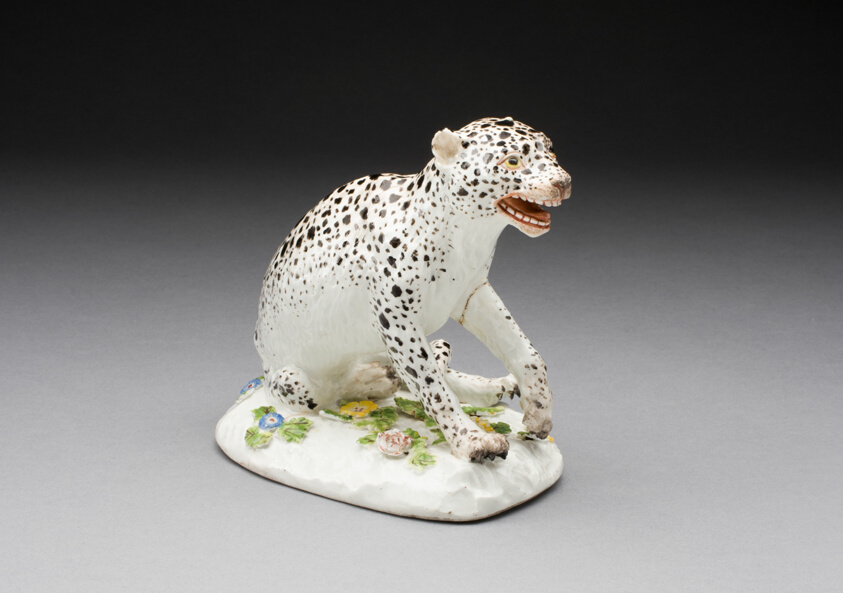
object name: Ceramics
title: Wounded Leopard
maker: Meissen Porcelain Manufactory; German, founded 1710; Model by: Kändler, Johann J.; German, 1706-1775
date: c. 1745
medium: Hard-paste porcelain with polychrome enamels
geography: Meissen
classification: sculpture; porcelain; european decorative arts; ceramics